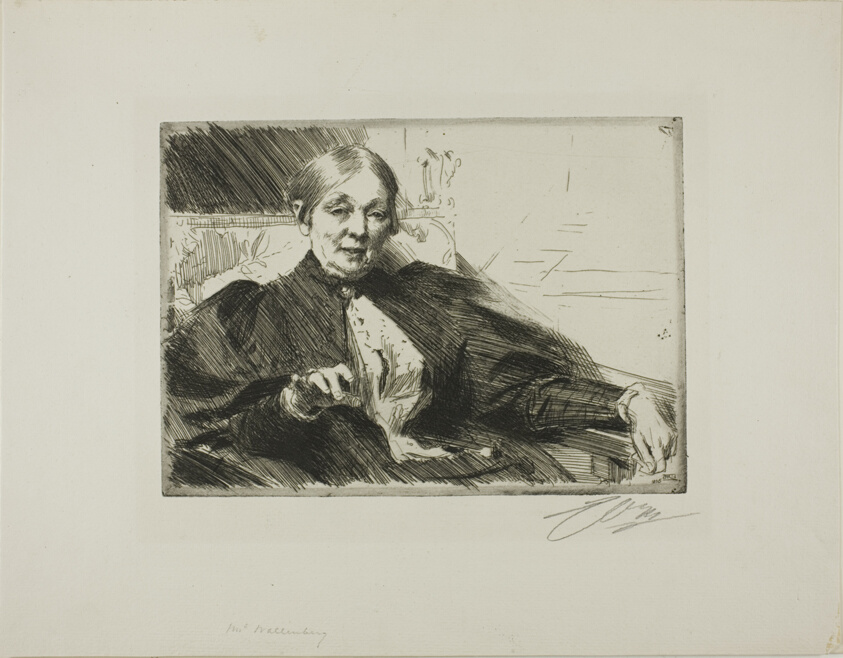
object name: Print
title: Anna Wallenberg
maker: Anders Zorn (Swedish, 1860-1920)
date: 1895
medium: Etching on ivory laid paper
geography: Sweden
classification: etching; print; prints and drawing